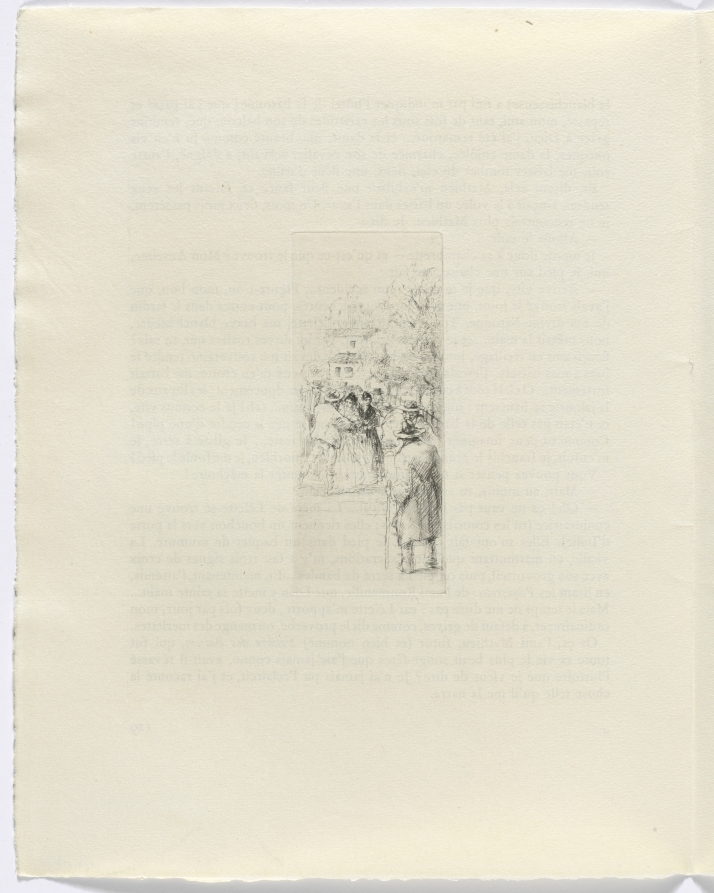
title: Frédéric Mistral: Mémoires et Recits by Frédéric Mistral: figures on street (page 130)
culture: France, 20th century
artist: Auguste Brouet (French, 1872–1941)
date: 1937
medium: etchings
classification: Portfolio